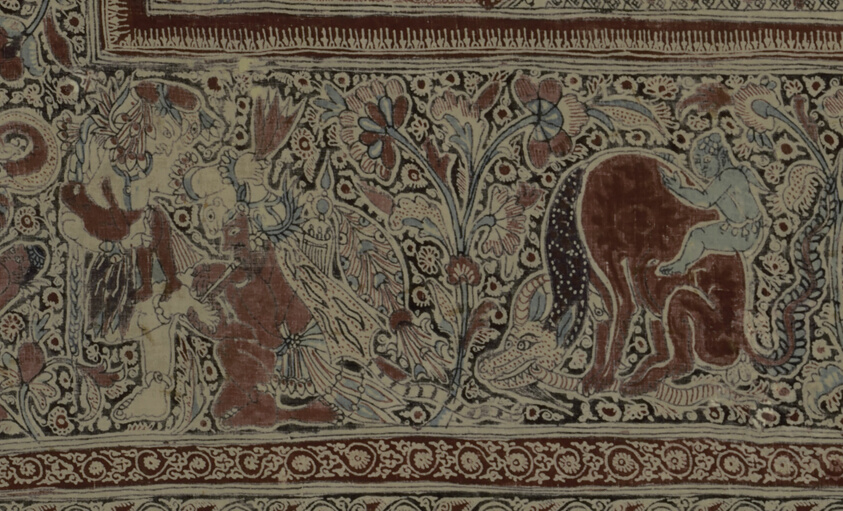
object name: Textile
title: Painted cotton with medallion and figures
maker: Deccan, India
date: 15th century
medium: cotton, plain weave; painted mordant; resist-dyed; painted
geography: India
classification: textile; weaving - printed